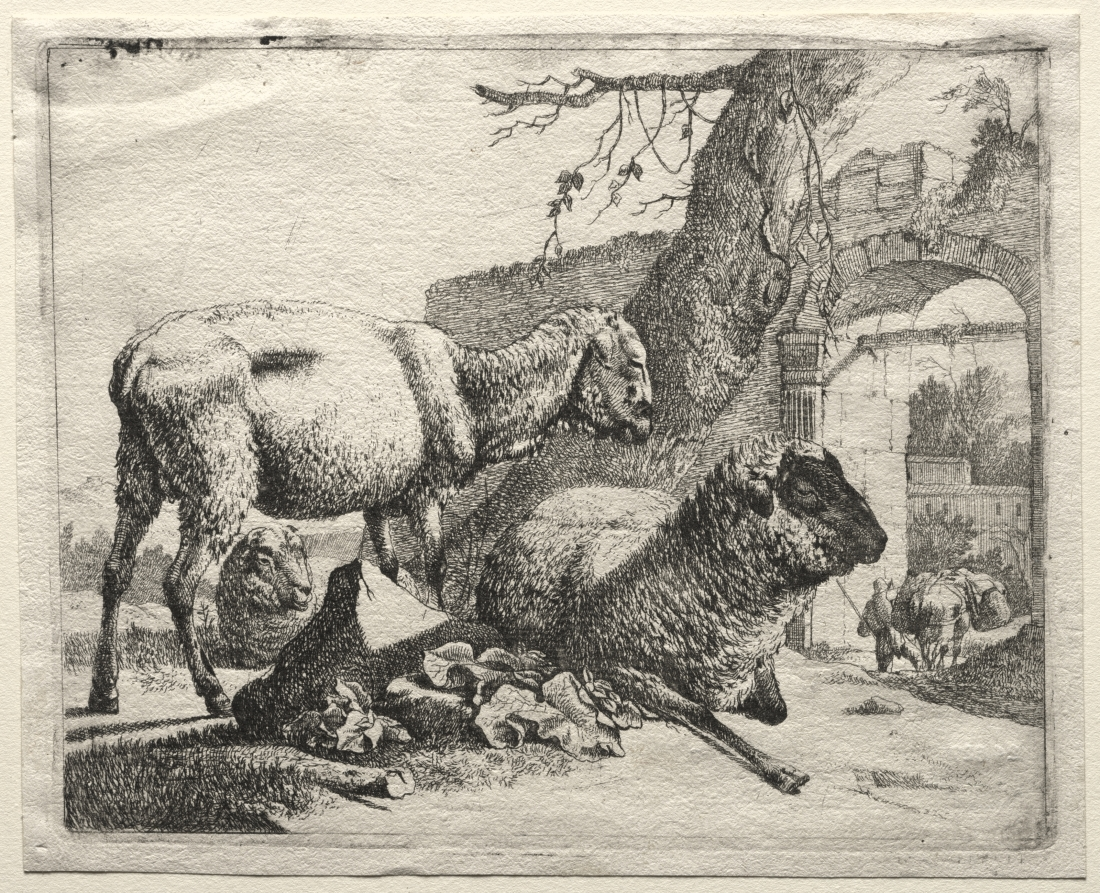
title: The Muleteer under the Gateway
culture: Germany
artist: Johann Heinrich Roos (German, 1631–1685)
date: 1665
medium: etching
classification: Print